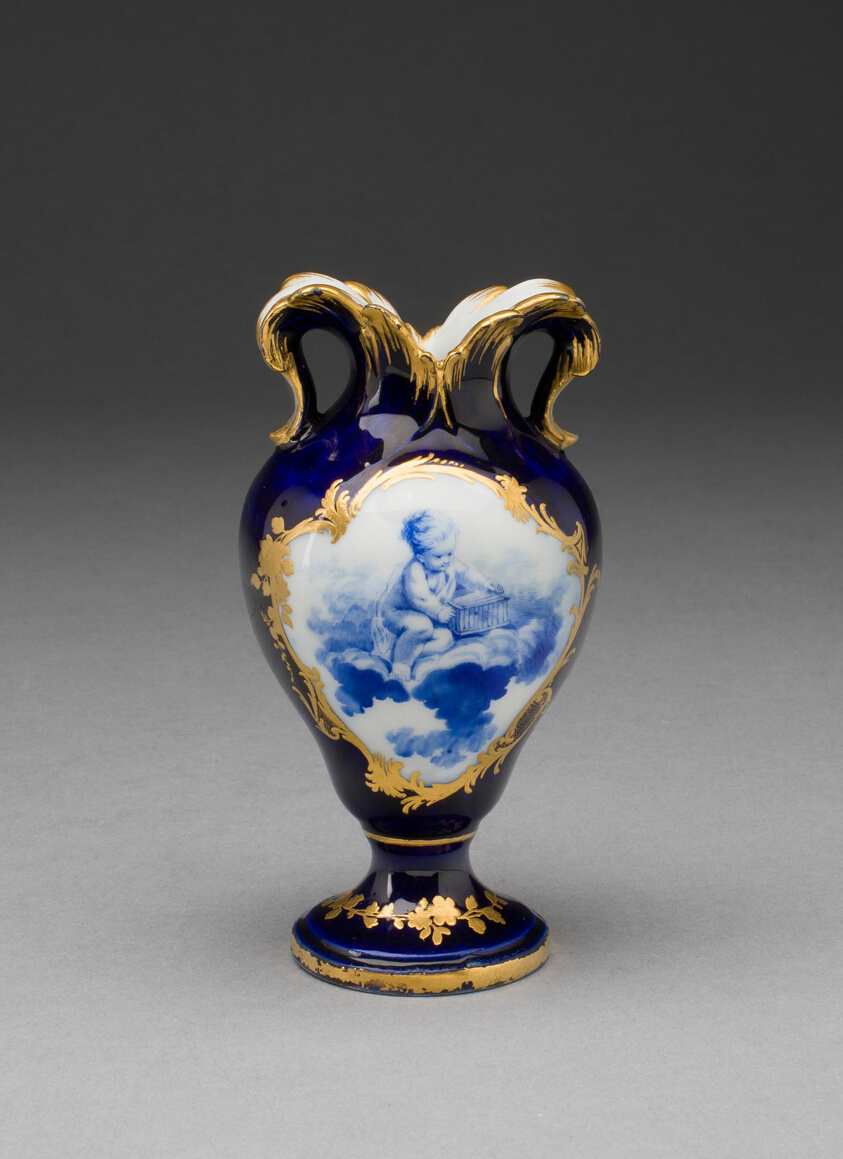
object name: Ceramics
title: Vase (Vase à Oreilles)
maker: Designed by Jean-Claude Duplessis (French, c. 1695-1774); Vincennes Porcelain Manufactory (French, 1740-1756, after became Sèvres Porcelain Manufactory)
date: c. 1754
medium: Soft-paste porcelain, underglaze and overglaze blue, and gilding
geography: Vincennes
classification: vase; porcelain; vessel; european decorative arts; ceramics